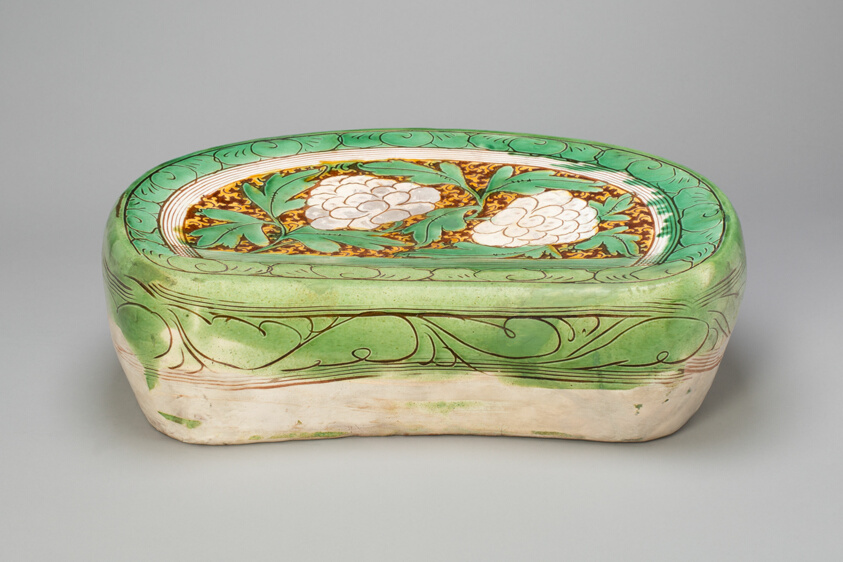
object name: Decorative Arts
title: Bean-Shaped Pillow with Peony Scroll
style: Chinese (culture or style)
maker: China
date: Jin dynasty, (1115–1234), 12th/13th century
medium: Cizhou ware; earthenware, slip-coated with green and amber-yellow glazes and carved and incised decoration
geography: China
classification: earthenware; asian art; ceramics; decorative arts